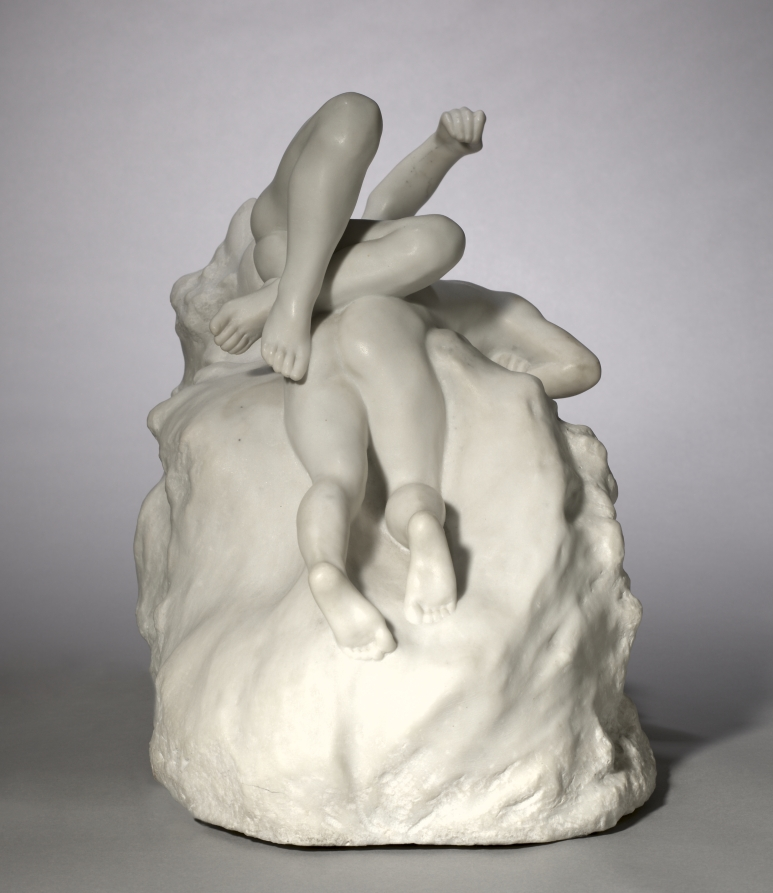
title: The Fall of the Angels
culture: France, late 19th-early 20th Century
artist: Auguste Rodin (French, 1840–1917)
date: c. 1890–1900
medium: marble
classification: Sculpture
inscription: signed under dexter wing of male figure: A. Rodin.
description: The entwined couple in this sculpture recalls the figures on Rodin’s monumental doorway The Gates of Hell. Struck by Dante Alighieri’s descriptions of the damned suffering in hell because of their sins of the flesh, Rodin populated his portal with embracing lovers symbolic of carnal desire and sensual pleasure. Here, a winged figure alludes to the biblical account of the angels who were cast out of Heaven after siding with Satan (Revelation 12:4). Rodin preferred marble for erotic subjects. The juxtaposition between the smooth, sensual surfaces of the figures and the rough-hewn areas below gives the impression that the couple is blossoming into life from hard, lifeless stone.